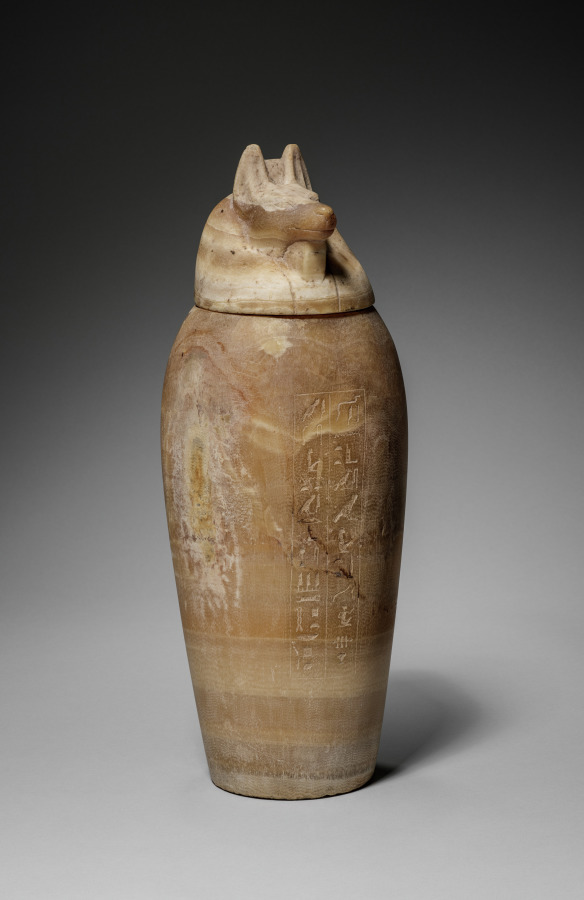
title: Canopic Jar with Jackal's Head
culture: Egypt, Late period (715–332 BCE), Dynasty 26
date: 664–525 BCE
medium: travertine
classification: Funerary Equipment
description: In the process of mummification, the liver, lungs, stomach, and intestines were removed, separately embalmed, and stored in specialized jars known as canopic jars (after a sailor in Greek mythology, who died at the town of Canopus in the Nile Delta and was worshipped there in the form of a human-headed jar). Each organ was identified with one of four funerary deities collectively known as the Sons of Horus: the liver with Imsety (man's head), the lungs with Hapy (baboon's head), the stomach with Duamutef (jackal's head), and the intestines with Qebehsenuef (falcon's head). It was their duty to protect the deceased and restore to him his body parts in the hereafter.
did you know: This jar is made of travertine stone-- subtle in color and with a captivating natural pattern-- with hieroglyphics carved on the front. Such jars were used to hold internal organs of the deceased and to preserve them for the afterlife.